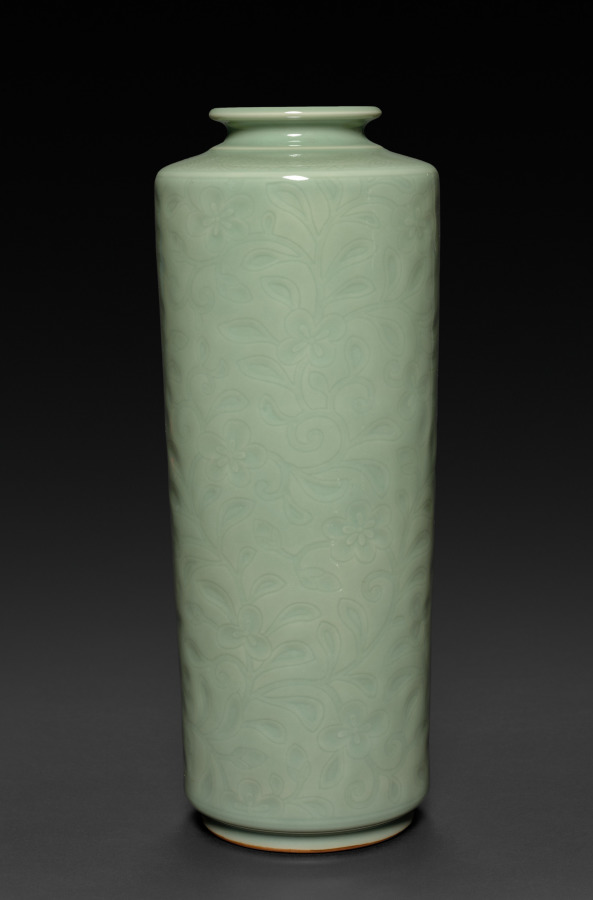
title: Tong-Shaped Vase with Flowers and Grasses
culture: Japan, Taishō period (1912–26) or Shōwa period (1926–89)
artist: Seifū Yohei IV (Japanese, 1872–1951)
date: 1914–46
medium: Porcelain with molded and carved design and green glaze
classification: Ceramic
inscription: 清風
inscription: 彫画 / 青磁花瓶 / 清風造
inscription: 青磁花瓶 / 彫画 【印】清風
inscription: 清風造 【印】成山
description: Many of the vases created by Yohei III and IV were made with reference to and in emulation of Chinese ceramics in both form and glazing. The vessel type called tongping, pronounced tōbin in Japanese, is tall and cylindrical, like the thick length of bamboo referenced in the shape of the ideograph tong 筒. Unlike the ancient gu, hu, and guan, this form did not emerge in China until the Ming dynasty, and many such vases date to the early Qing dynasty. Two green-glazed vases, CMA 2022.225 by Yohei III and this one by Yohei IV, are interpretations of this form. Yohei III’s version has slightly hunched shoulders and is somewhat wider at the top below the small neck and lip. Yohei IV’s vase is more angular. The wide rack of molded cloud encircling the Yohei III vase rises subtly from very low relief banding above and below it, accentuating the vessel’s rounded edges and complementing the form. In contrast, the allover flower vine pattern on the body and “seven treasures” pattern at the collar of the vase by Yohei IV evokes a garment’s cuffed sleeve, like the common English appellation for this type of vessel—“sleeve vase.”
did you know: Seifū Yohei IV continued to create works in the studio’s signature colors but also produced pieces with strong color and flare that were his interpretations of Qing dynasty (1644–1911) glazes.